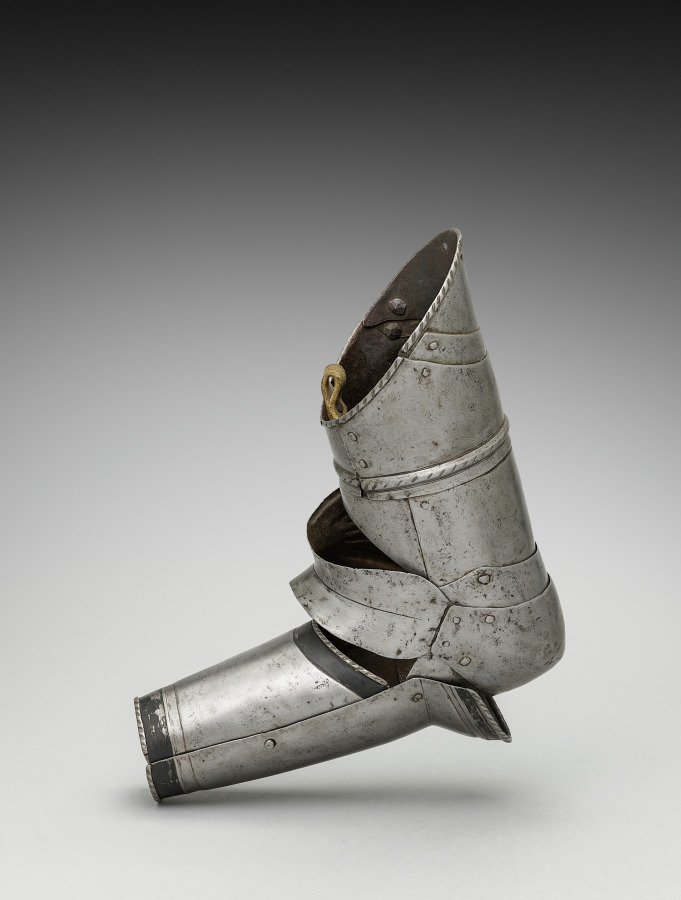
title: Right Vambrace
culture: Germany, 19th century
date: 1801–1900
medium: steel with black paint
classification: Arms and Armor